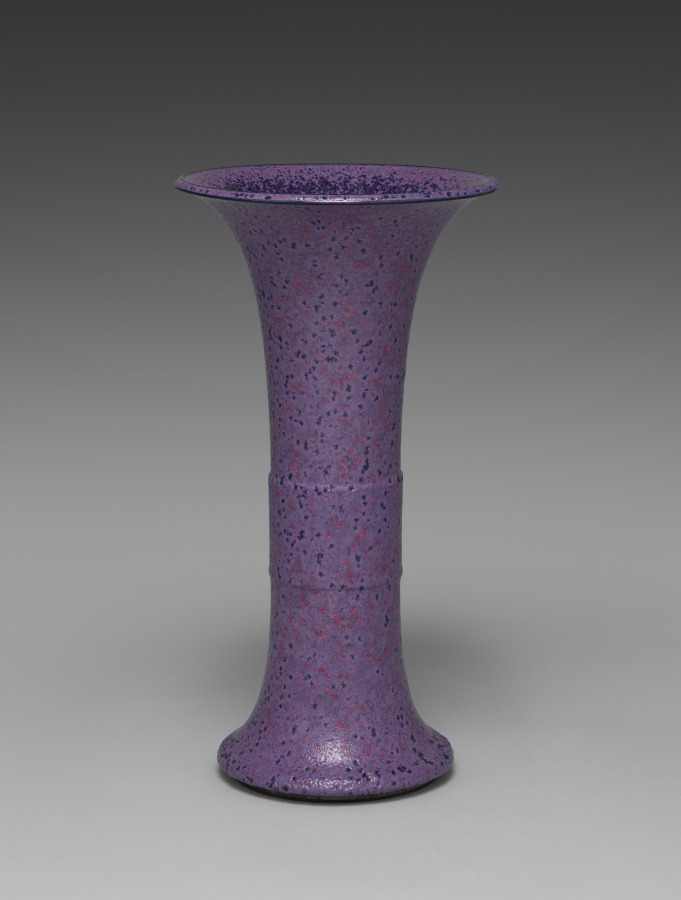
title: Gu-Shaped Vase with Patina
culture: Japan, Taishō period (1912–26) or Shōwa period (1926–89)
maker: Seifū Yohei IV (Japanese, 1872–1951)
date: 1914–46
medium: Porcelain with overglaze color enamel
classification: Ceramic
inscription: 清風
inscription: 成山清風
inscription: 清風造 【印】 清風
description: Yohei IV’s interest in bold, colorful designs is on full display in this purple gu-shaped vase. He not only exhibits his penchant for bold colors but also shows off a complex surface that suggests the patina on an ancient bronze. The body of the vase is a dark, greenish blue over which there is a thick application of color. While the predominant overlaid color is lavender purple, salmon pink and cornflower blue appear in places along with myriad nearly black forms, perhaps floating dandelion seeds or tiny flowers, scattered over the surface.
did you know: The glaze recalls in some respects a Chinese glaze named “snowflake blue,” or xuehualan (Japanese sekka’ai), a low-fired lead-fluxed glaze.